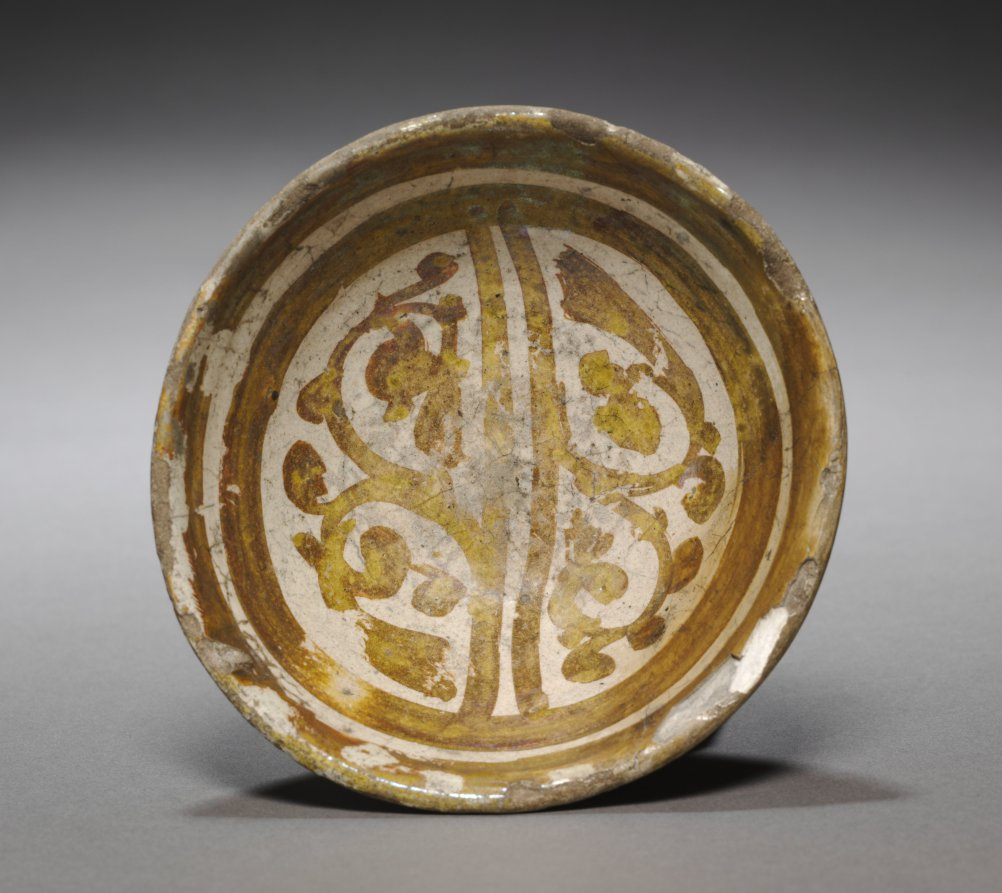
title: Bowl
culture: Fatimid Egypt, Fustat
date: 1000s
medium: earthenware with luster-painted design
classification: Ceramic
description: Lusterware The theme of light is a dominant element in Islamic art. In ceramics, works made with a reflective metallic glaze, known as luster, were prized throughout the Islamic world and beyond. Developed first in Basra, Iraq, during the 700s with the rise of Islam along with sumptuary laws prohibiting the use of precious metal vessels, lusterware techniques soon spread to different regional centers, notably Málaga and Valencia in Spain. Lusterware ceramics were created through a double-firing process: the first firing of the vessel with a lead and tin oxide glaze produced the smooth white ground, meant to emulate Chinese porcelain. Patterns were then painted on the white vessel with a glaze of copper and other metal oxides. Refiring at a low temperature yielded an iridescent luster. Tonalities varied from one region to another.